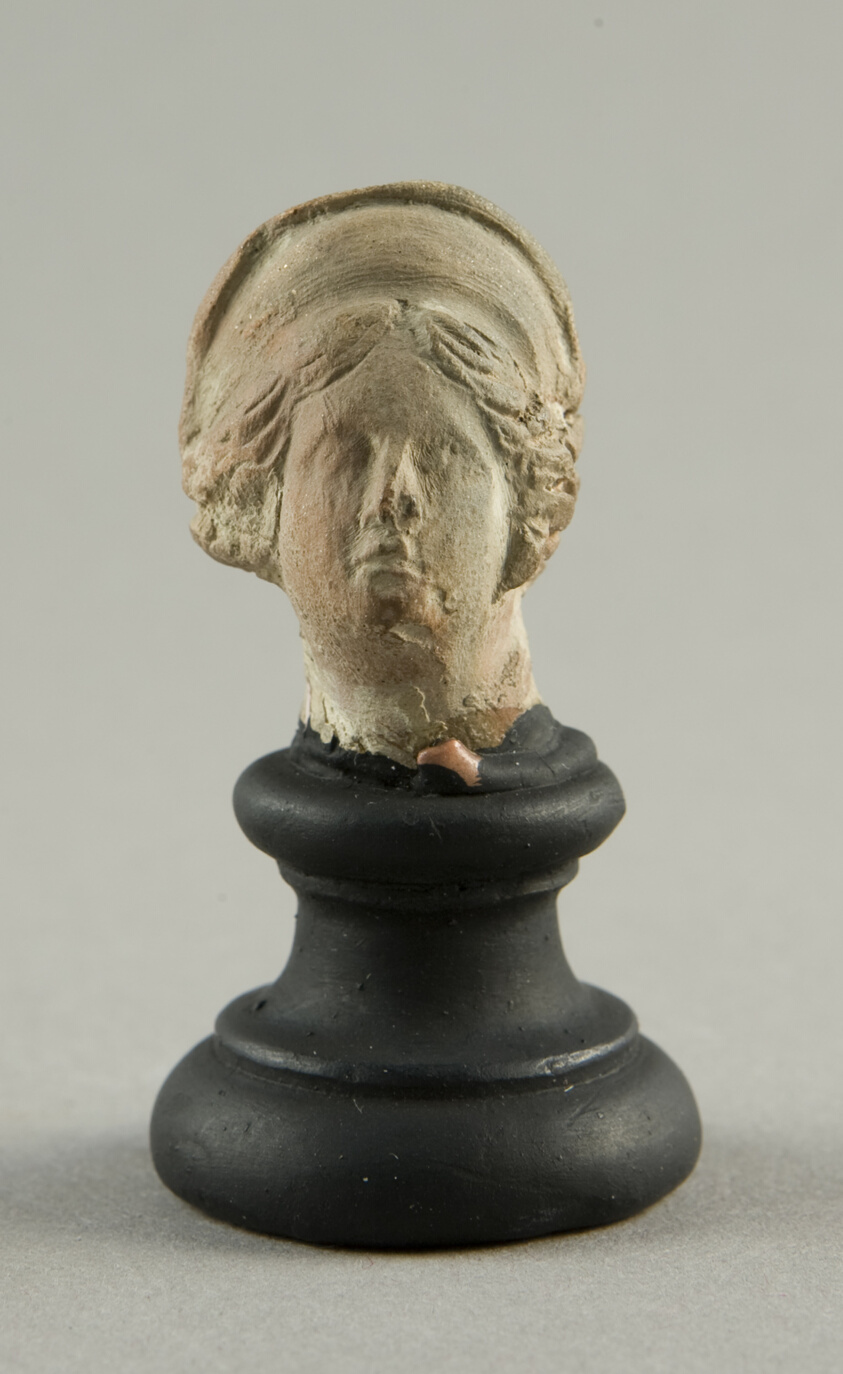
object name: Sculpture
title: Head of a Woman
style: greek, ancient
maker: Greek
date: 4th-3rd century BCE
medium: terracotta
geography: Greece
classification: earthenware; ceramics; sculpture; ancient art